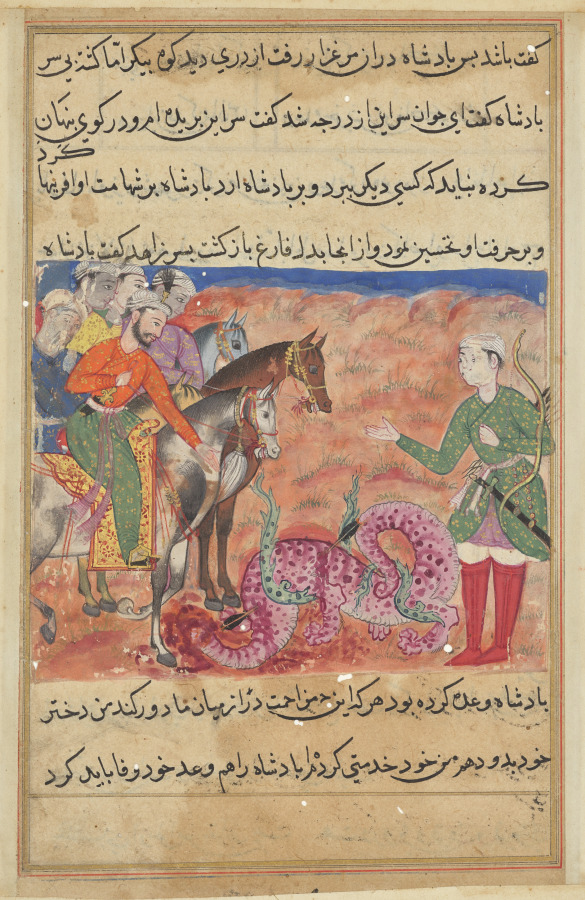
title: The pious man’s son presents the slain dragon to the king, from a Tuti-nama (Tales of a Parrot): Fifty-second Night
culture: Mughal India, court of Akbar (reigned 1556–1605)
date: c. 1560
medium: gum tempera, ink, and gold on paper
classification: Painting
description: The king, wearing an orange tunic, is astounded, and he gestures to the headless body of the dragon, pierced with poisoned arrows, on the ground before him. Impressed by the young man’s courage and skill, the king allows him to marry his daughter and names him vice-regent.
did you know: The king is distinguished by the sarpech, or plume ornament, in his turban.